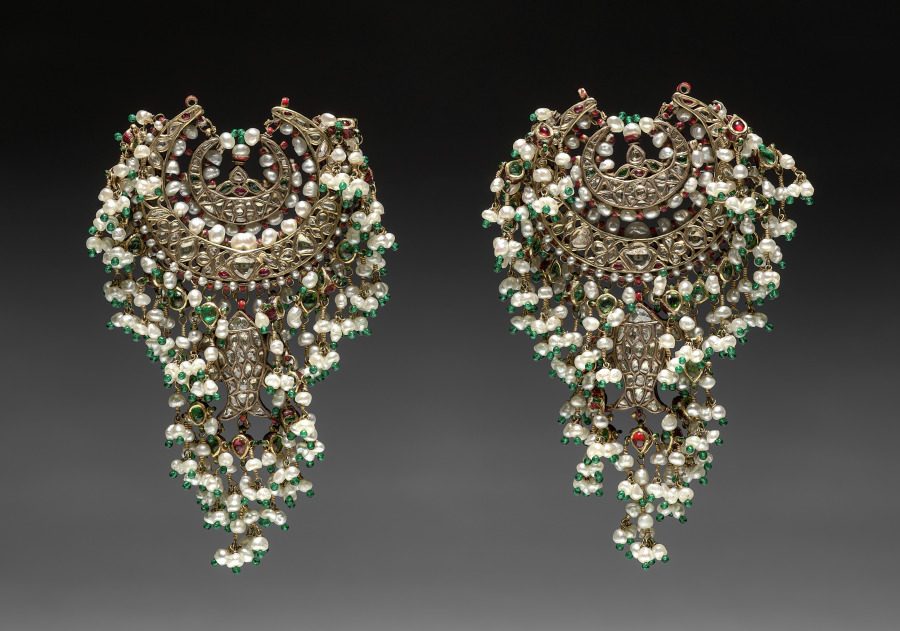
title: Pendants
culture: India, Delhi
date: 1800s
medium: Gilt silver with diamonds, emeralds, rubies, pearls, and enamel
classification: Jewelry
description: Worn either as earrings or pendants from a crown, these double-sided, symmetrical jeweled assemblages each feature a fish as the central ornament. The pair of fish is one of a set of eight auspicious symbols known in Indian art for more than two millennia. As creatures of the waters that are essential for life, they betoken fertility and abundance—attributes of an ideal ruler.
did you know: The fish are crystal on one side and emerald on the other.